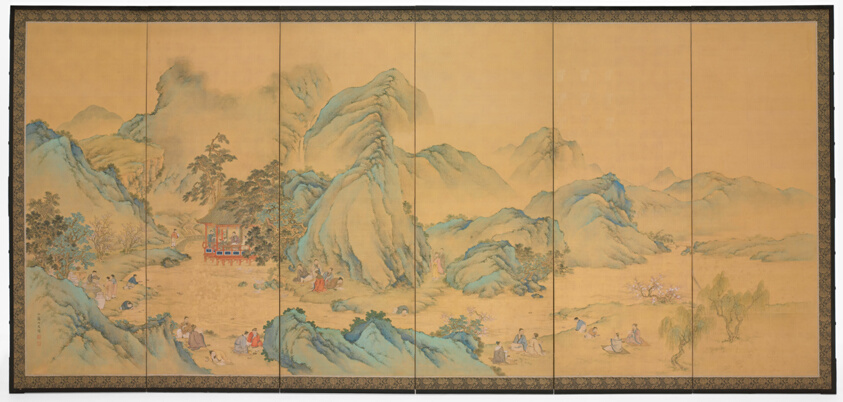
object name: Painting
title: The Gathering at the Orchid Pavilion (front); Geese among Reeds (back)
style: Japanese (culture or style)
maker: Noguchi Shohin (Japanese, 1847-1917)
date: 1900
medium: Pair of six-panel screens; ink, colors, and gold on silk (front); ink and silver on paper (back)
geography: Japan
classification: screen; painting; asian art